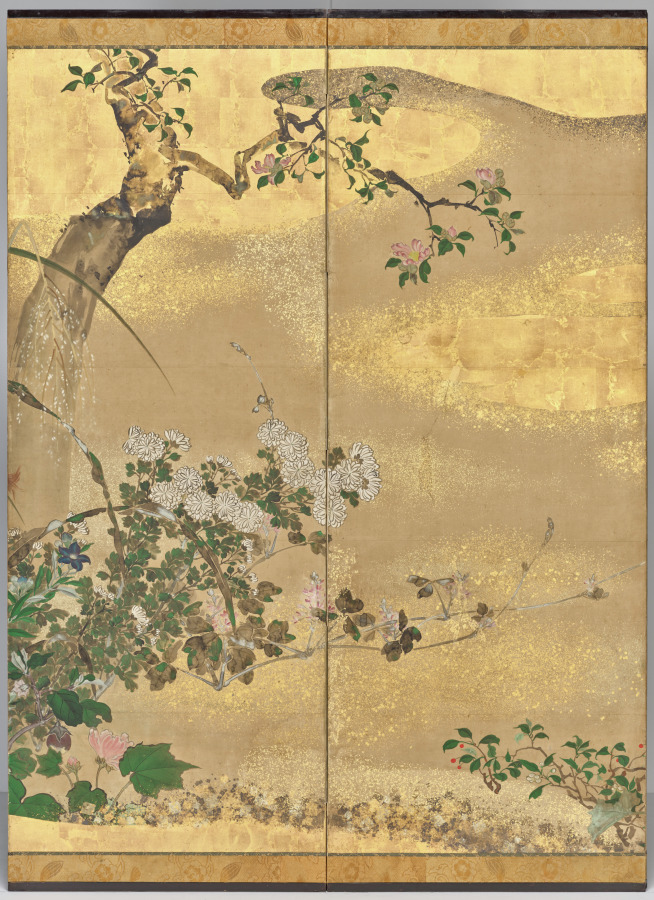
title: Flowers and Trees of the Four Seasons (left screen)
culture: Japan, Edo period (1615–1868)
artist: Watanabe Shikō (Japanese, 1683–1755)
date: early to mid-1700s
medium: Six-panel folding screen; ink, color, gold, silver, and gilding on paper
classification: Painting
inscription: 始興之印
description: The painter Watanabe Shikō had a special interest in scientific realism, based on interactions with his patron Konoe Iehiro. Shikō combined his attention to accurate depiction of plants with strong ink outlines and decorative elements like gold and silver, arriving at an innovative style that influenced many of his peers in the city of Kyoto.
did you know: One plant in these screens, tumeric, or ukon in Japanese, is found in Okinawa.